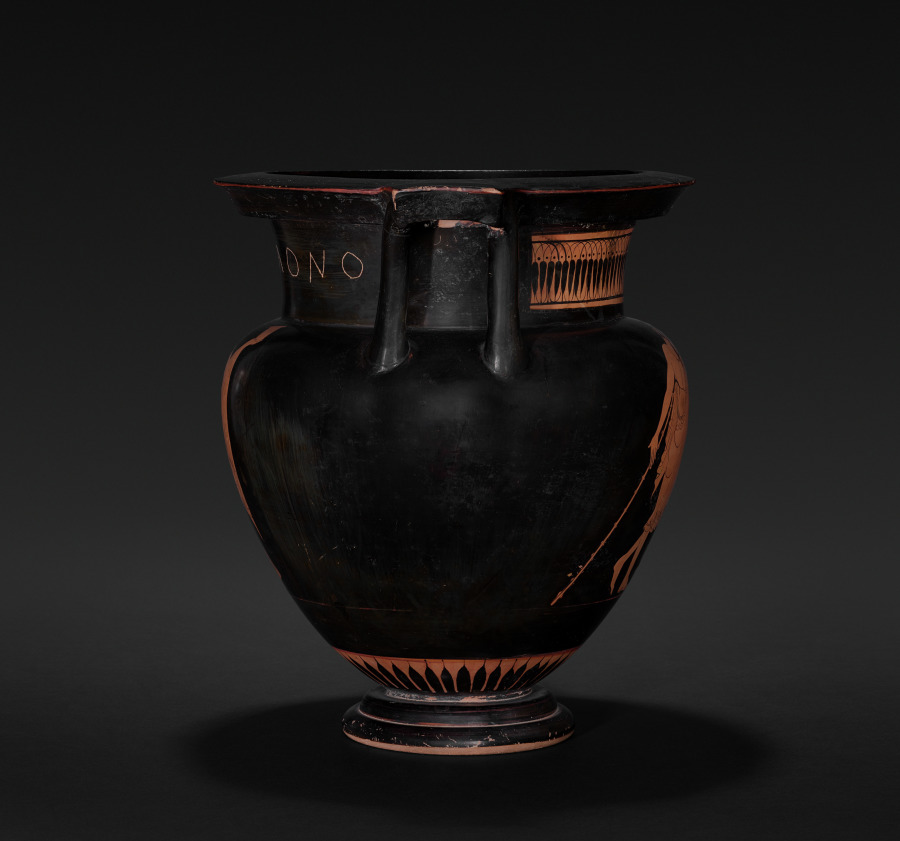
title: Red-Figure Column Krater (Mixing Vessel): Komos (Revel)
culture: Greek, Attic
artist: attributed to Pig Painter (Greek, Attic, active c. 480–460 BCE)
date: 470–460 BCE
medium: ceramic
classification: Ceramic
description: Used for mixing wine and water at a symposium (or drinking party), this column-krater speaks to the perils and pleasures of drinking. On one side, a bearded man holding a staff and a drinking cup leans forward, a red stream of vomit falling from his mouth. Before him is a nude young boy, holding a tortoiseshell lyre and a basket or pail. On the other side, a young man dances, holding a deep cup and wearing just one boot. On the neck above him, scratched in large letters, is the name SIMONOS, probably indicating that the vase once belonged to someone named Simon.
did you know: The bearded man on this vase is vomiting—perhaps a humorous warning against over imbibing.